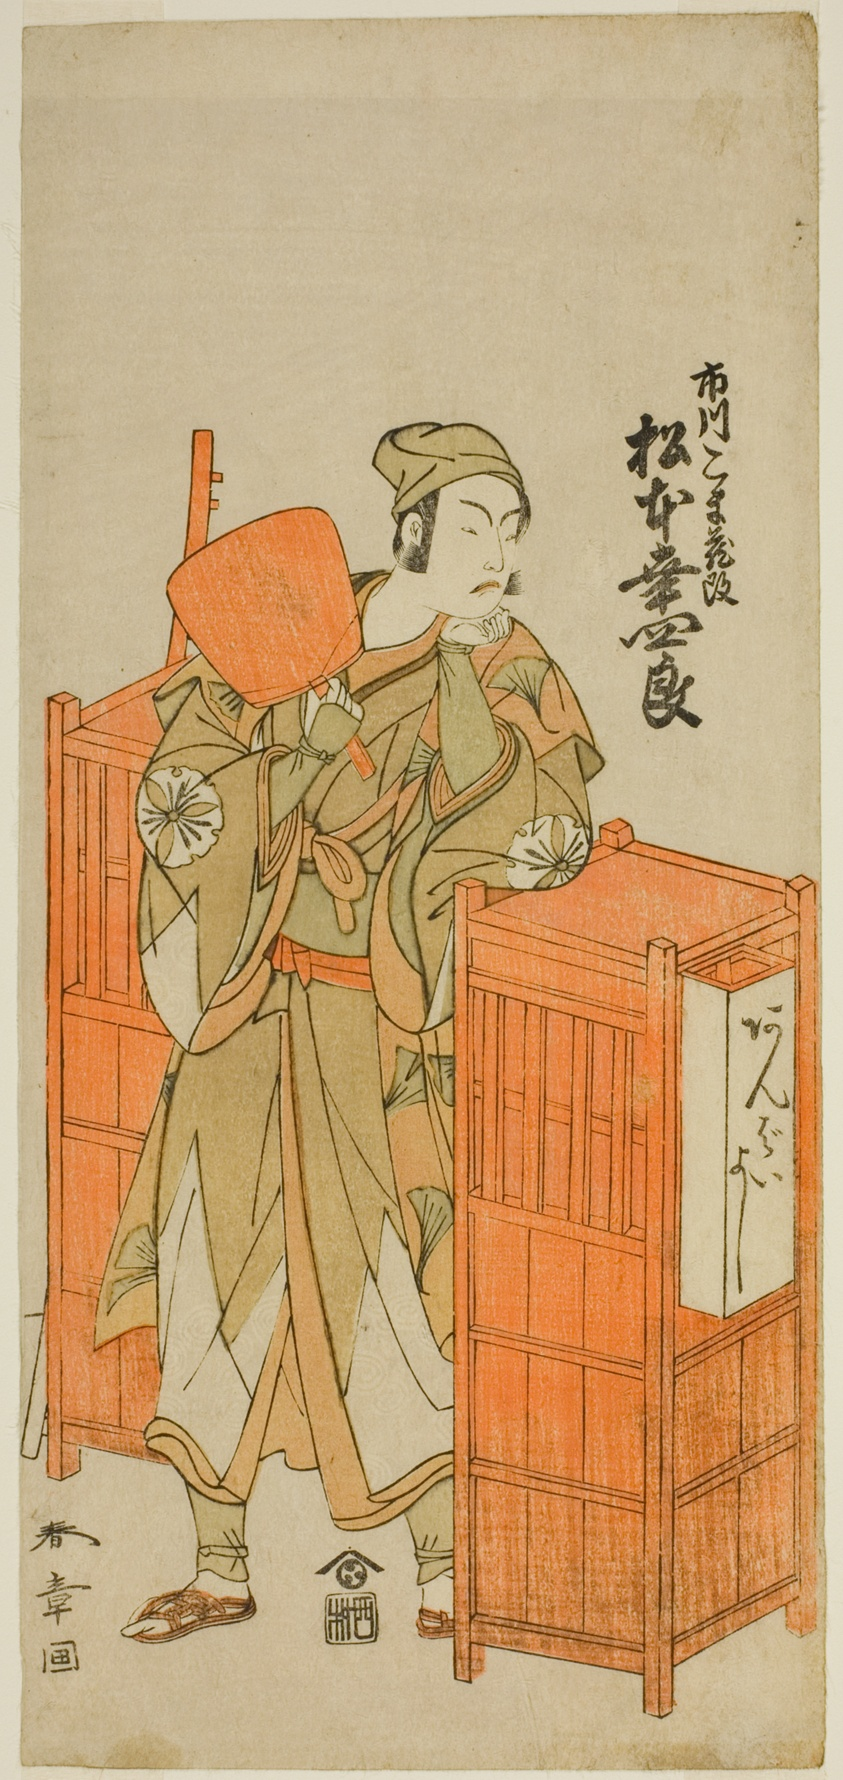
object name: Print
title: The Actor Matsumoto Koshiro IV as Sagami Jiro Disguised as Ambaiyoshi Gorohachi in the Play Oyoroi Ebido Shinozuka, Performed at the Nakamura Theater in the Eleventh Month, 1772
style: Japanese (culture or style)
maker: Katsukawa Shunsho 勝川 春章; Japanese, 1726-1792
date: c. 1772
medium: Color woodblock print; hosoban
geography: Japan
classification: woodblock print; print; asian art